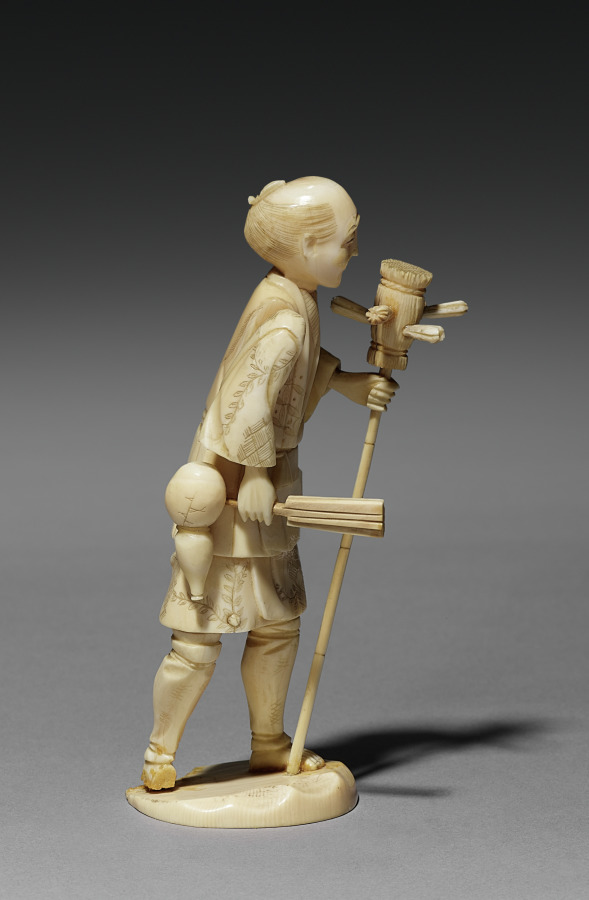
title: Man Holding a Standard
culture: Japan, Meiji period (1868–1912)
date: late 1800s-early 1900s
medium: ivory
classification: Ivory